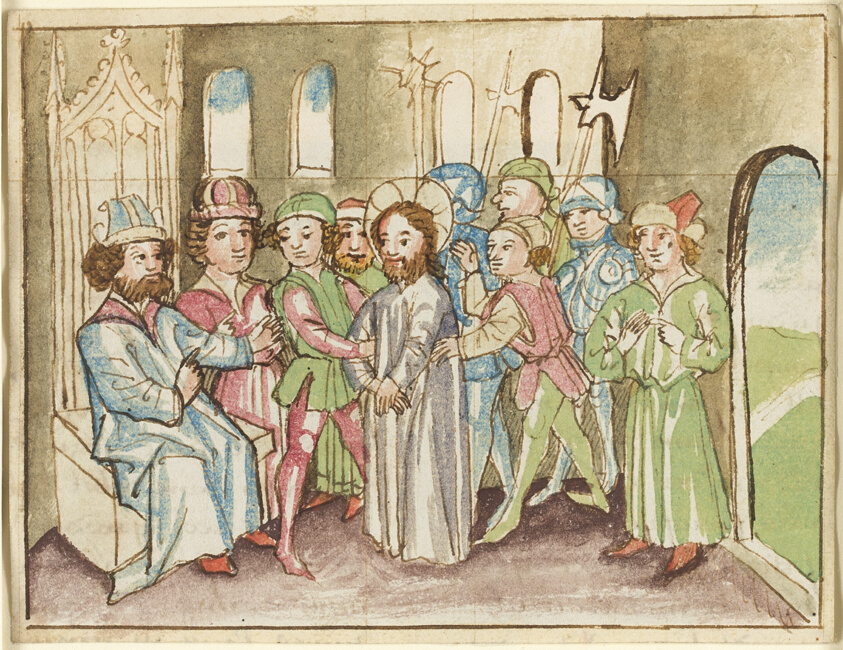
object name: Drawing and Watercolor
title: Christ before the High Priest Annas, from a Plenarium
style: medieval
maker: German Painter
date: about 1470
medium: Pen and brown ink and watercolor (recto) and pen and brown ink, with brush and red opaque watercolor (verso), on cream laid paper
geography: Germany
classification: watercolor; manuscript; prints and drawing; paper